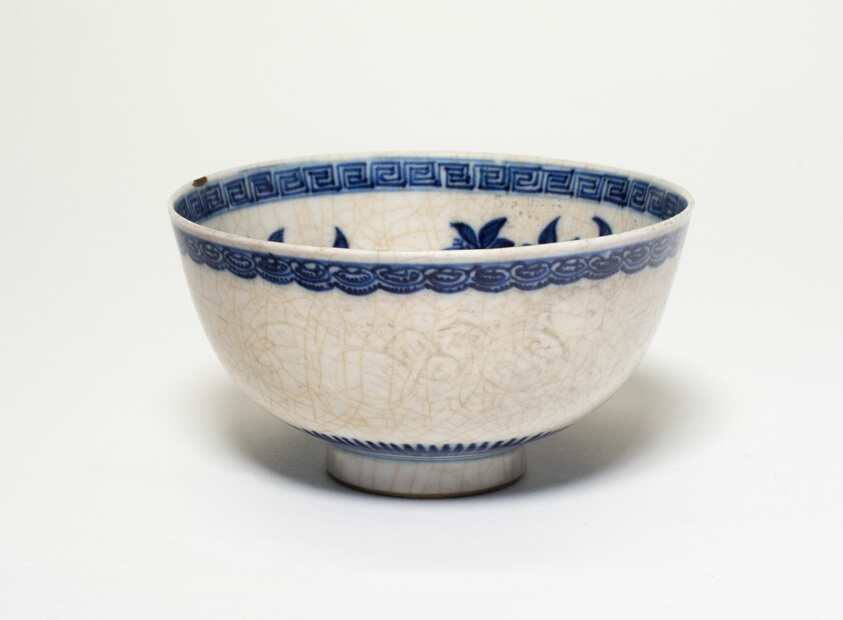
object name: Vessel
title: Bowl with Sprays of Pomegranate and Peaches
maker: China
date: Qing dynasty (1644–1911), Yongzheng period (1723–1735)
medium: Porcelain painted in underglaze blue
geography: China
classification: porcelain; asian art; ceramics